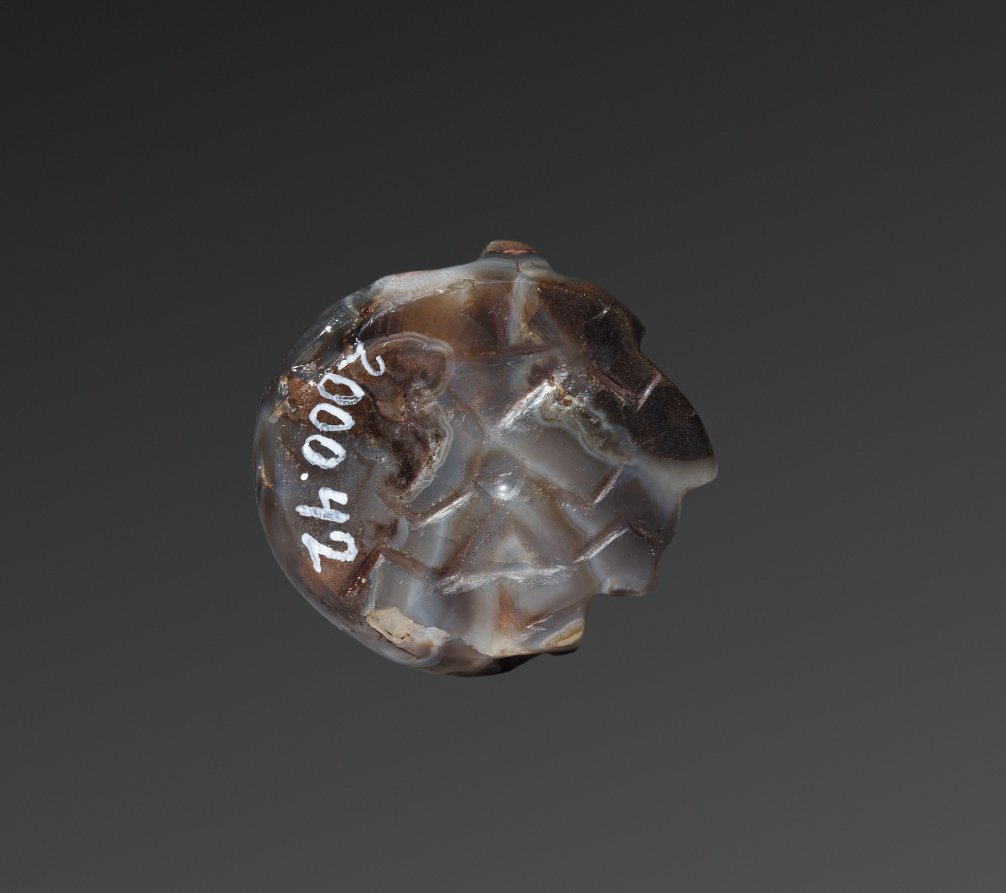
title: Seal Amulet in the form of a Lion's Head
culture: Mesopotamia, Iraq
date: 3800–3500 BCE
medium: agate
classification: Amulets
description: Delicately carved from exotic semiprecious stone, this tiny seal in the shape of a lion's head (rendered in profile) would have functioned not only as the legal signature of its ancient owner but also a protective amulet, magically conferring to its wearer the lion's natural virtues of courage, leadership, and strength.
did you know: These amulets were commonly found in tombs of women and children.